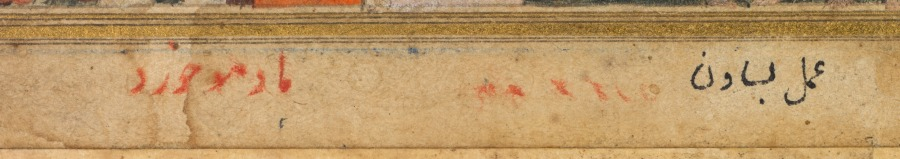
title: A feast for Babur hosted by his half-brother Jahangir Mirza in Ghazni in May 1505, from a Babur-nama (Memoirs of Babur)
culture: India, Mughal, 16th century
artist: Basavana (Indian, active c. 1560–1600)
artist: and Madhav Khurd (Indian, active late 1500s)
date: c. 1589; outer margins added c. mid-1900s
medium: Gum tempera and gold on paper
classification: Painting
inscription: verso: Persian text, in nasta‘liq script: . . . presented many gifts. In that year most of the rivers had become very swollen, to the extent that the Dih-i Ya‘qub River could not be forded. I brought the boat I had made at the lake and floated it in the waters of Dih-i Ya‘qub opposite Kamri and all the people crossed by boat. For this reason we went through the Sajavand pass and straight through crossing the river at Kamri by boat. We arrived at Kabul in the month of Dh’ul-Hijja [May 1505]. A few days earlier, Sayyid Yusuf Beyg had died of colic. At Kush Gunbad, Nasir Mirza had requested leave and remained behind to get provisions for his retinue from his own domain, saying he would follow in two or three days. Once he had left us he sent his entire army to the Nur valley on account of a minor act of disobedience by the people of the Nur valley. [Given] its rice fields and the location of its citadel on the peak of the mountain as . . .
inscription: recto: Persian inscription in bottom margin, in nasta‘liq script: the work of Basavana / [ . . . ] / Madhav Khurd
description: Twenty-one years before his conquest of Delhi, Babur took control of territories in Afghanistan, including the cities of Kabul and Ghazni. His half-brother, who controlled the region around Ghazni, ordered that a party be thrown in honor of Babur’s arrival from the north. Drinking parties and feasts in lavish movable tent settings, where gifts were exchanged, alliances forged, and relationships cemented, were as important to the building of the empire as the battles.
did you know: A manager directs servers to bring spoons and lay out the buffet table.